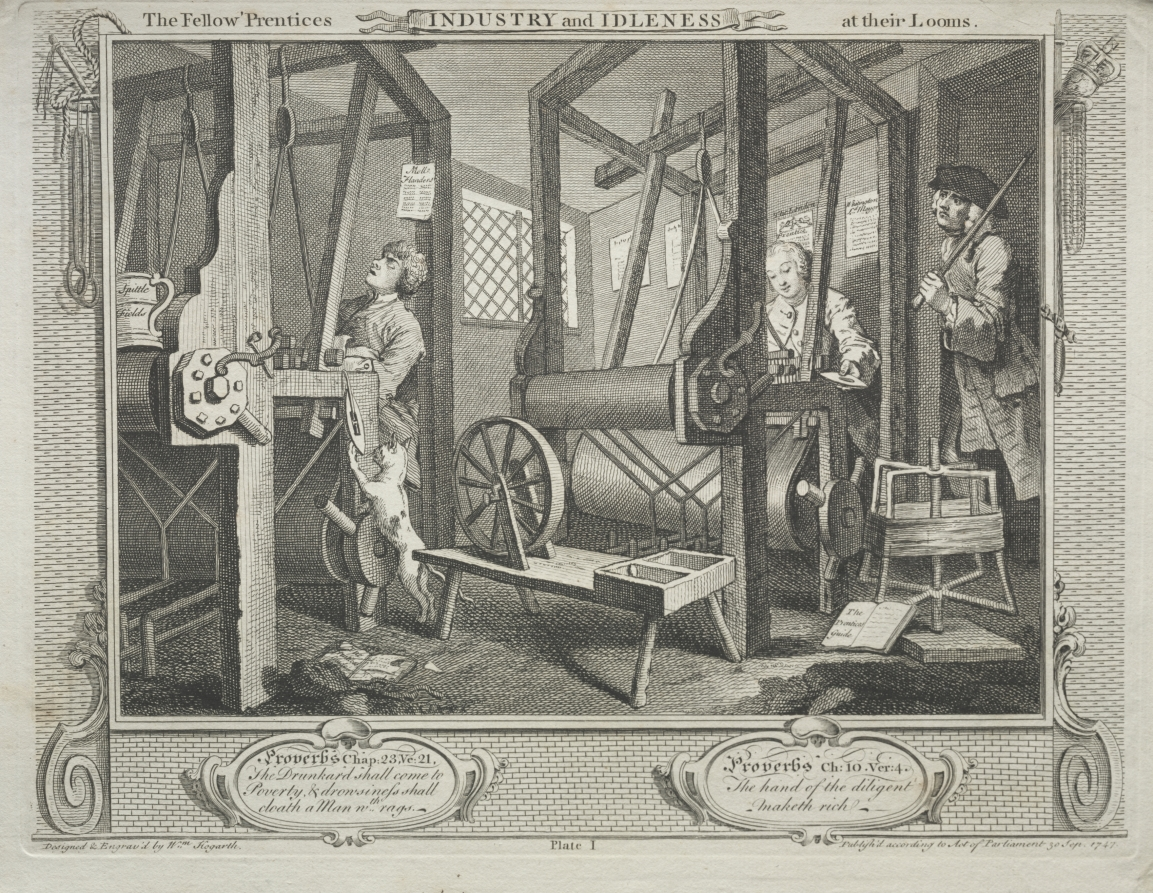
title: Industry and Idleness: The Fellow Prentices at their Looms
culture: England, 18th century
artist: William Hogarth (British, 1697–1764)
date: 1747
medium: etching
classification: Print